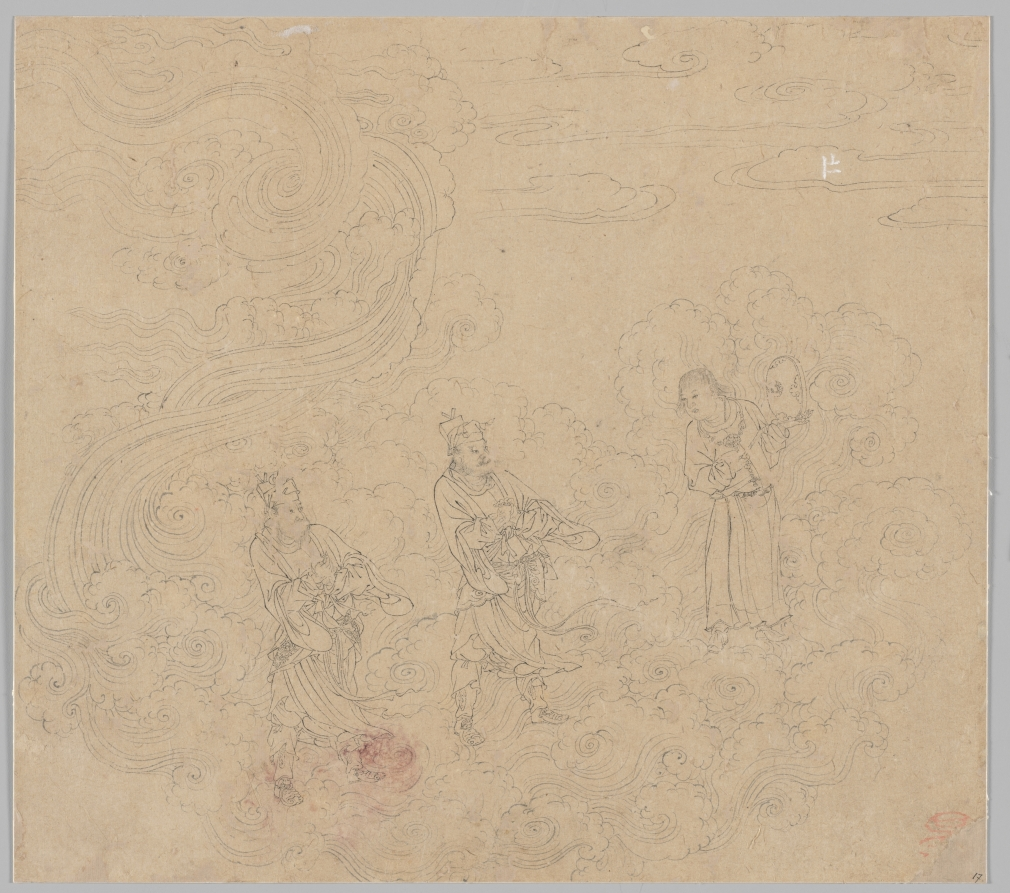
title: Album of Daoist and Buddhist Themes: Procession of Daoist Deities: Leaf 17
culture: China, Southern Song dynasty (1127-1279)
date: 1200s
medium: Album, ink on paper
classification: Painting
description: This extraordinary album has 50 paintings on a variety of religious subjects. They were likely created by several master craftsmen to share with studio apprentices as models for fulfilling commissions. The Jade Emperor and the Daoist pantheon make up the first 26 leaves. The next 14 leaves portray the Buddhist Ten Kings of Hell administering punishments to the dead. The third section, called “Clearing the Mountains,” features divine soldiers, led presumably by the deity Erlang Shen 二郎神, fighting undesirable creatures.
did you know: The Daoist Gods of Wind and Fire are attended by a young boy holding a drum and drumstick.